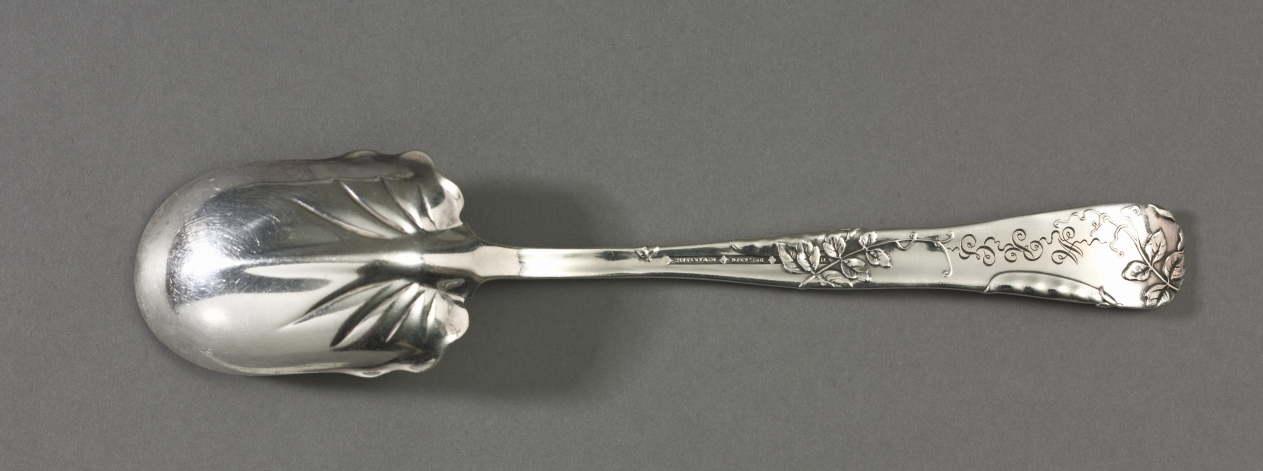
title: Vine Pattern Salad Spoon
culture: America, New York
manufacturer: Tiffany & Co. (America, New York, est. 1837)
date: c. 1872–80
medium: silver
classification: Silver